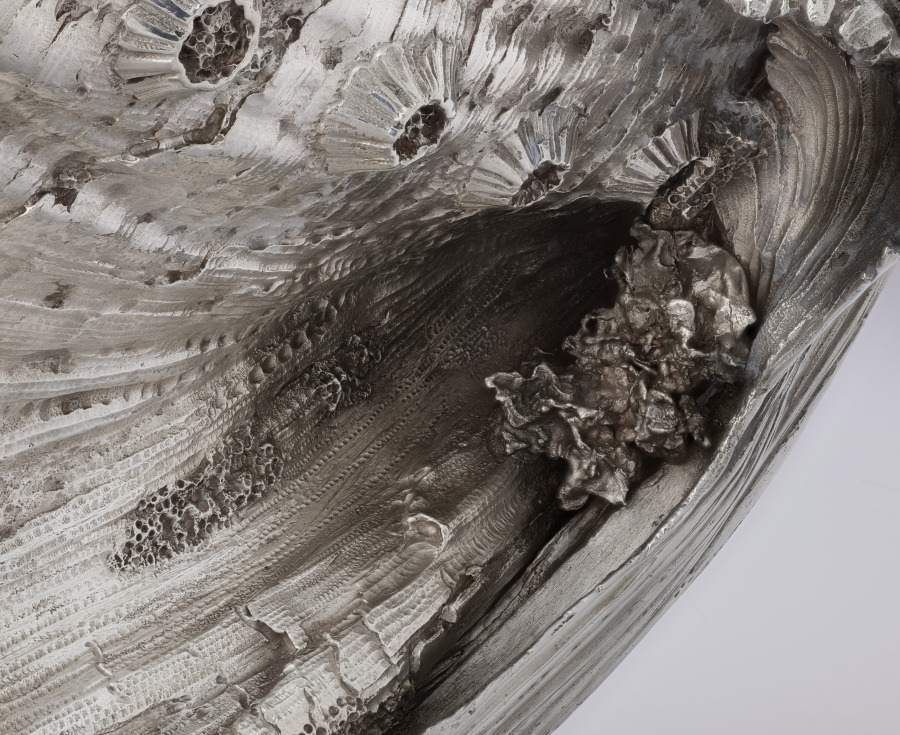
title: Tureen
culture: France, Paris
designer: Juste-Aurèle Meissonnier (French, 1695–1750)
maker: Pierre-François Bonnestrenne (French)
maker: Henry Adnet (French, 1745)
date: 1735–38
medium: silver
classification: Silver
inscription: engraved Meissonnier signature.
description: See entry for cover record 1977.182.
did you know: The langoustine, pigeon, and vegetables were cast using real examples giving the silver copies lifelike detail and appearance.